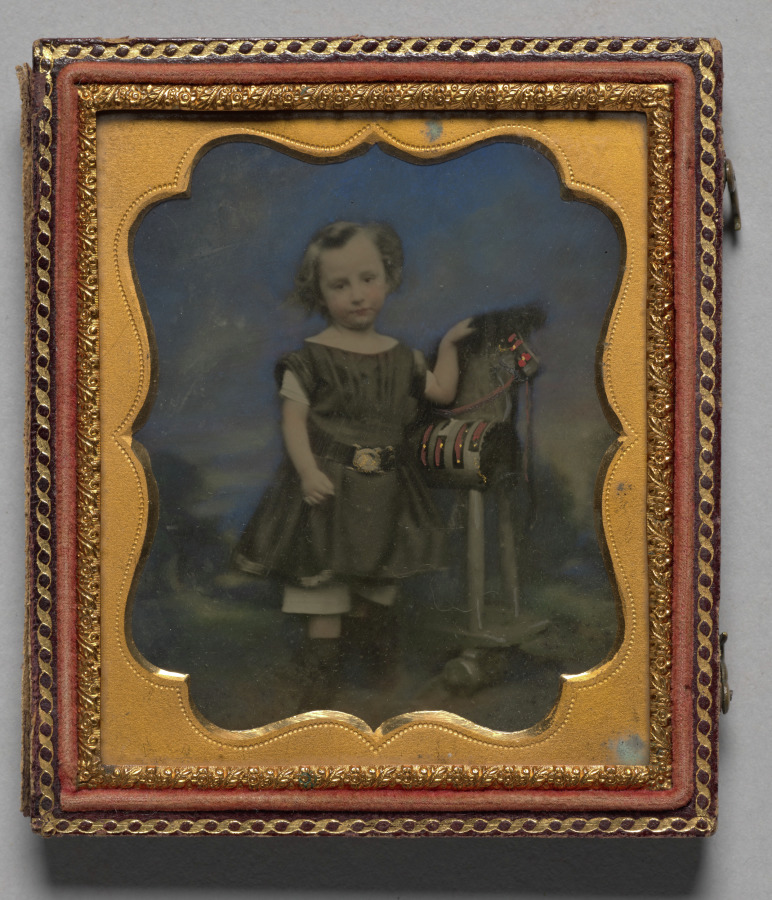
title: Boy with hobby horse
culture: America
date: c. 1862–65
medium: ambrotype, tinted, sixth plate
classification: Photograph